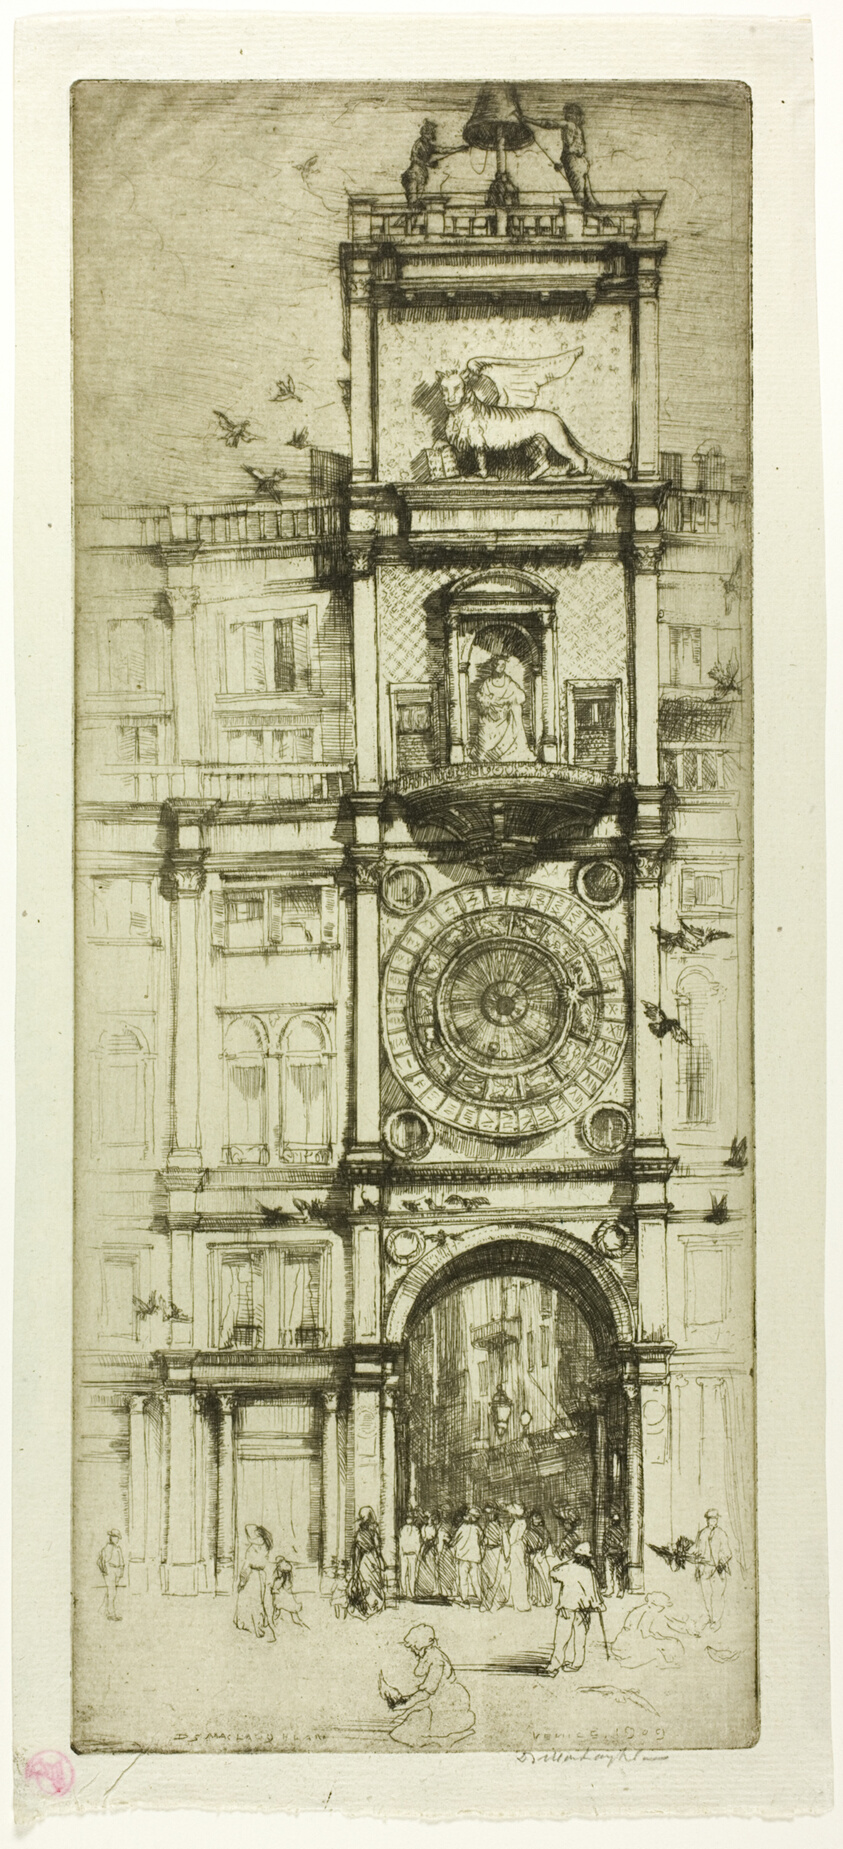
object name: Print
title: The Clock Tower, Venice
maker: Donald Shaw MacLaughlan (American, born Canada, 1876-1938)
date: 1909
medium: Etching in black on cream laid paper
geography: United States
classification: etching; print; prints and drawing